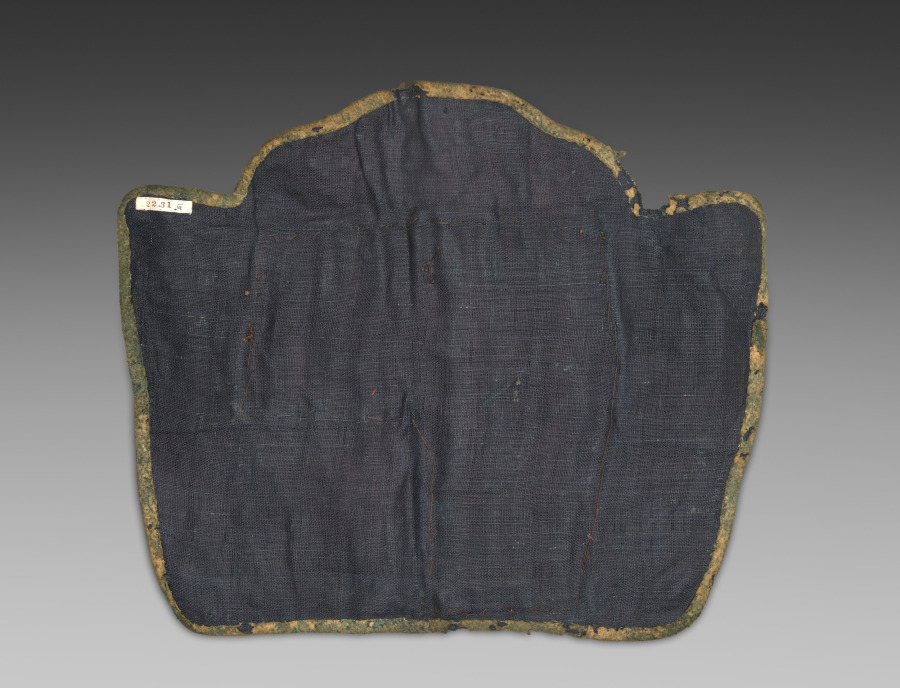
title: Shin Guard (Sune-ate)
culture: Japan, Edo period (1615–1868)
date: 1615–1868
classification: Arms and Armor